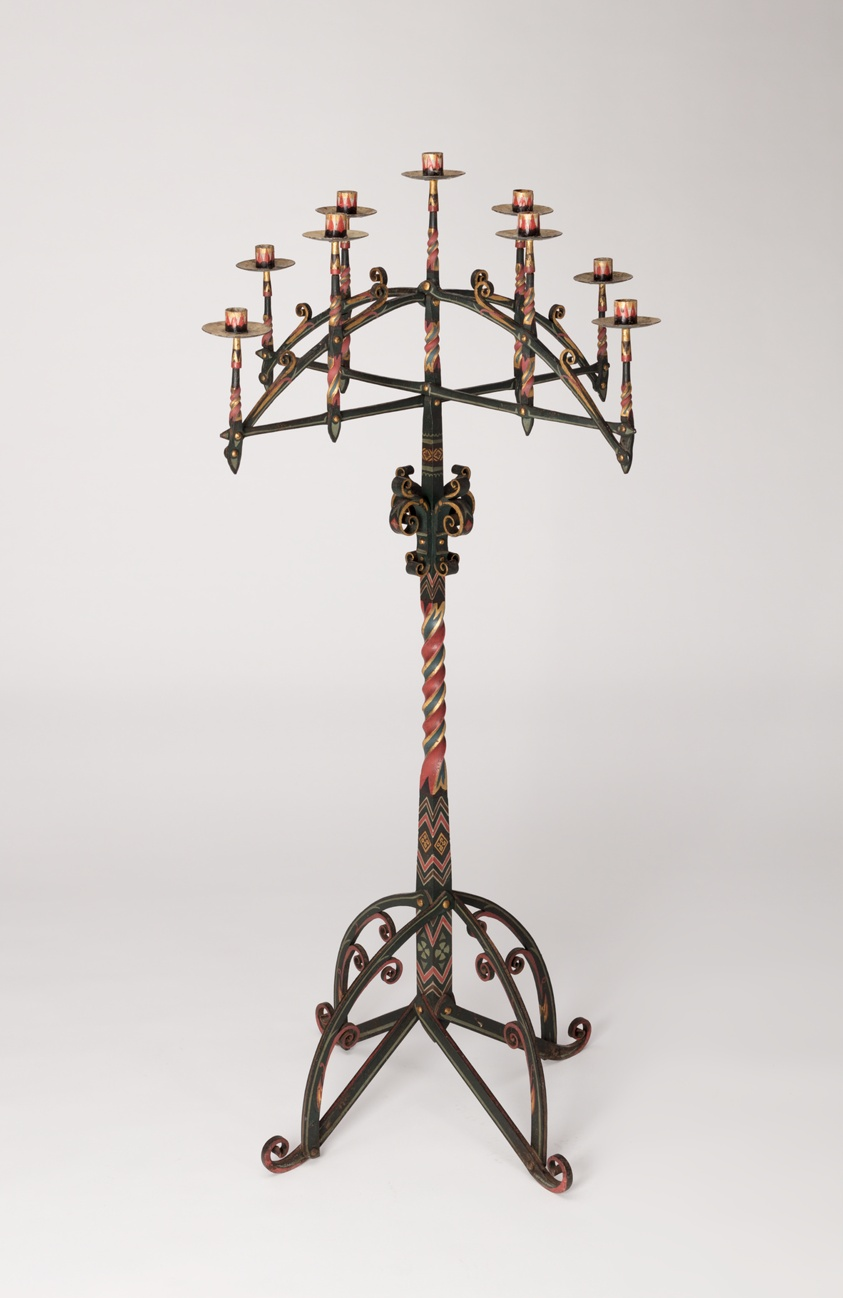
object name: Metalwork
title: Candelabra (One of a Pair)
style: gothic revival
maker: William White (English, 1825-1900)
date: c. 1860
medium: Painted bronze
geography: England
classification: candleholder - candelabra; candleholder; metalwork